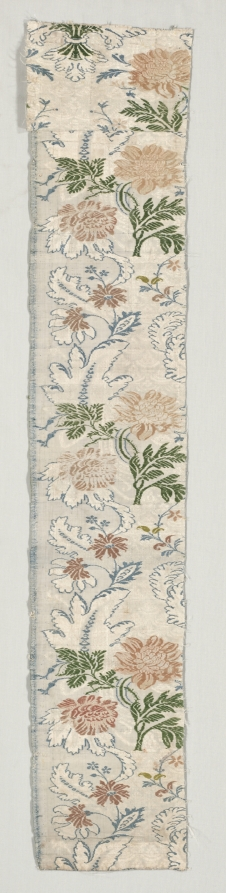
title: Fragment (Mounted with 1919.544a)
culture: Italy, 17th century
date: 1600s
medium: brocade, silk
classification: Textile